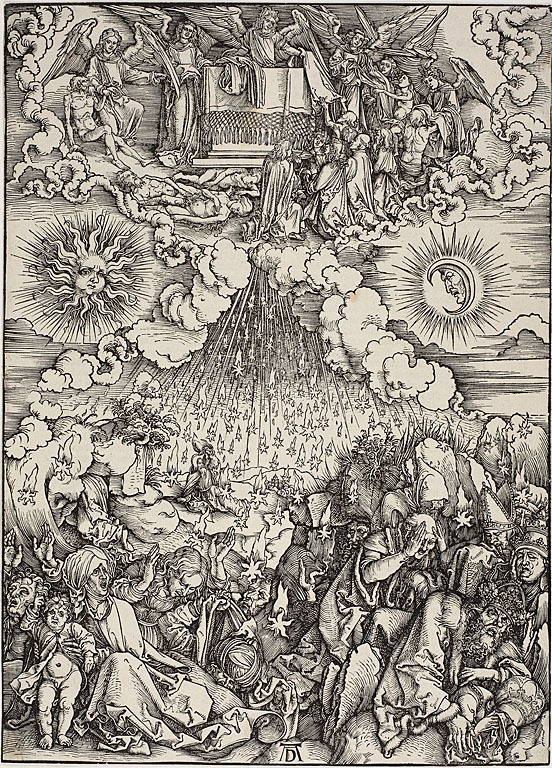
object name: Print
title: The Opening of the Fifth and Sixth Seals, from The Apocalypse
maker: Albrecht Dürer (German, 1471-1528)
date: c. 1496–98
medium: Woodcut in black on ivory laid paper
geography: Germany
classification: woodcut; print; prints and drawing; paper